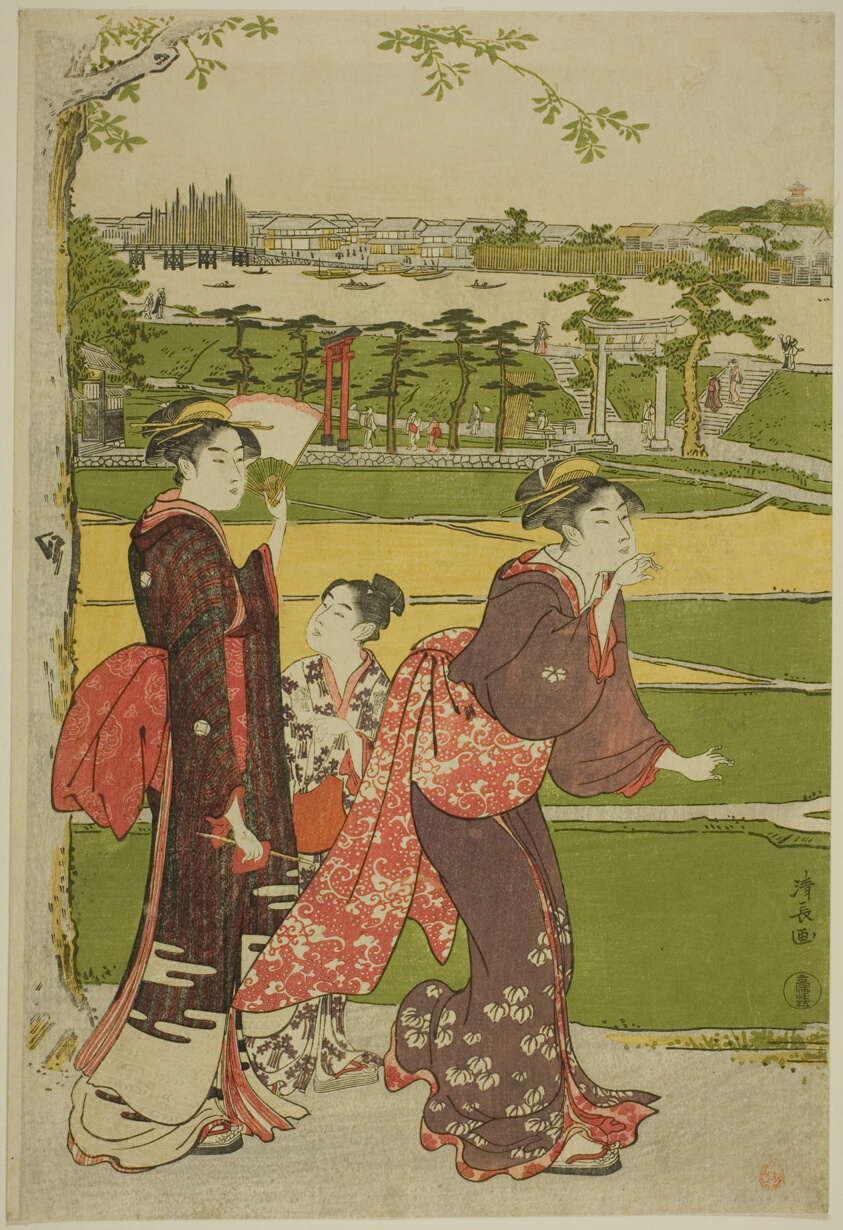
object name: Print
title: Women Visiting Mimeguri Shrine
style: Japanese (culture or style)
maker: Torii Kiyonaga (Japanese, 1752-1815)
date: c. 1787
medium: Color woodblock print; right sheet of oban triptych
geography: Japan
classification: woodblock print; print; asian art